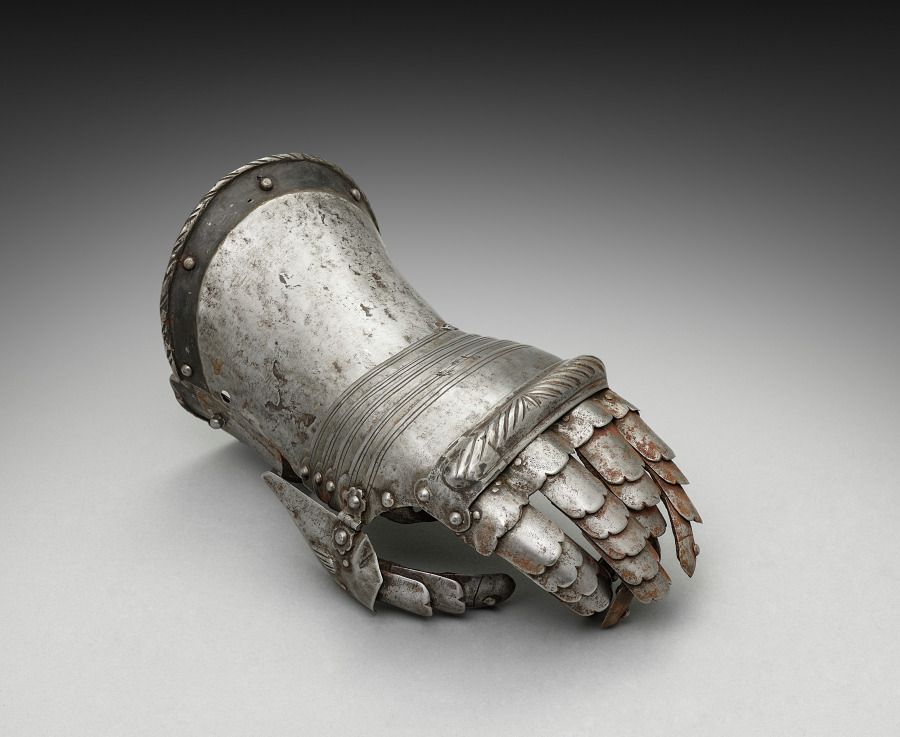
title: Left Gauntlet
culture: Germany, 19th century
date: 1801–1900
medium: steel with black paint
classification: Arms and Armor